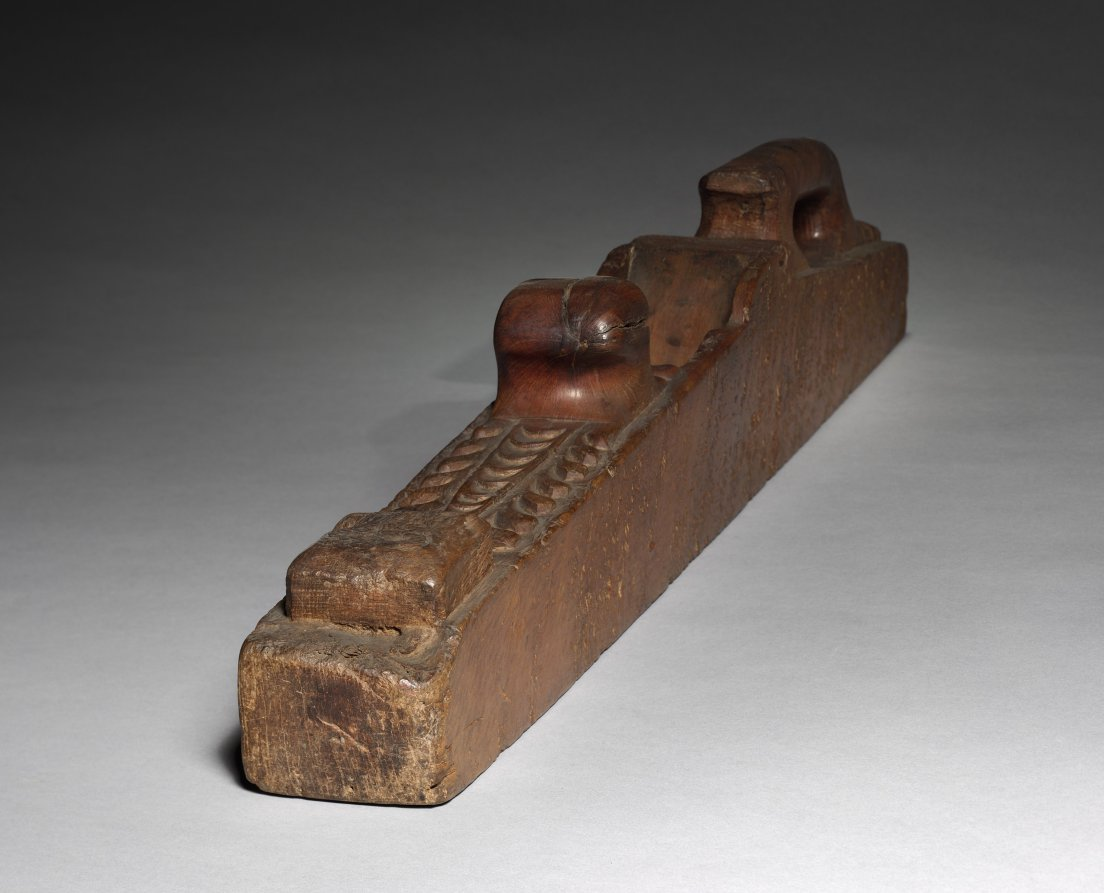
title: Plane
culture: France, 17th century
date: 1600s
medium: wood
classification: Tool